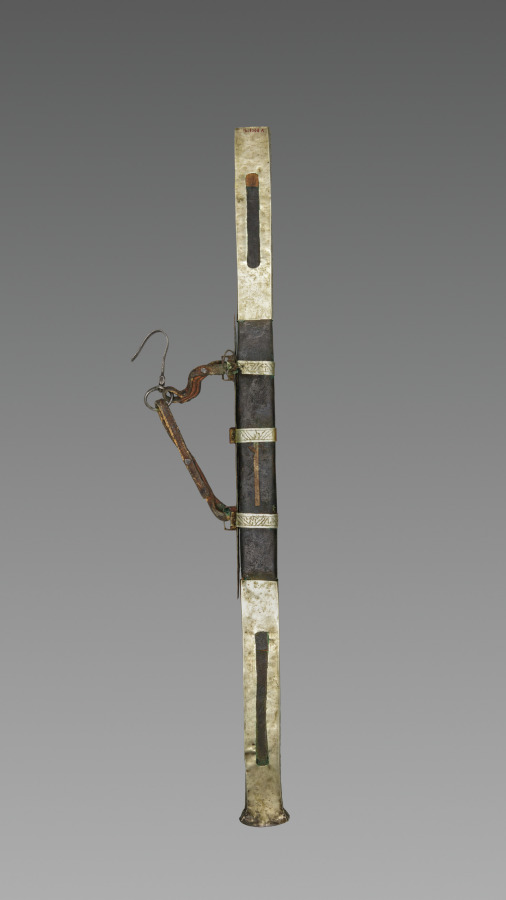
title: Scabbard for Sword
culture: Tibet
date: 1800s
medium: iron and silver with bone, turquoise, leather and brass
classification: Arms and Armor